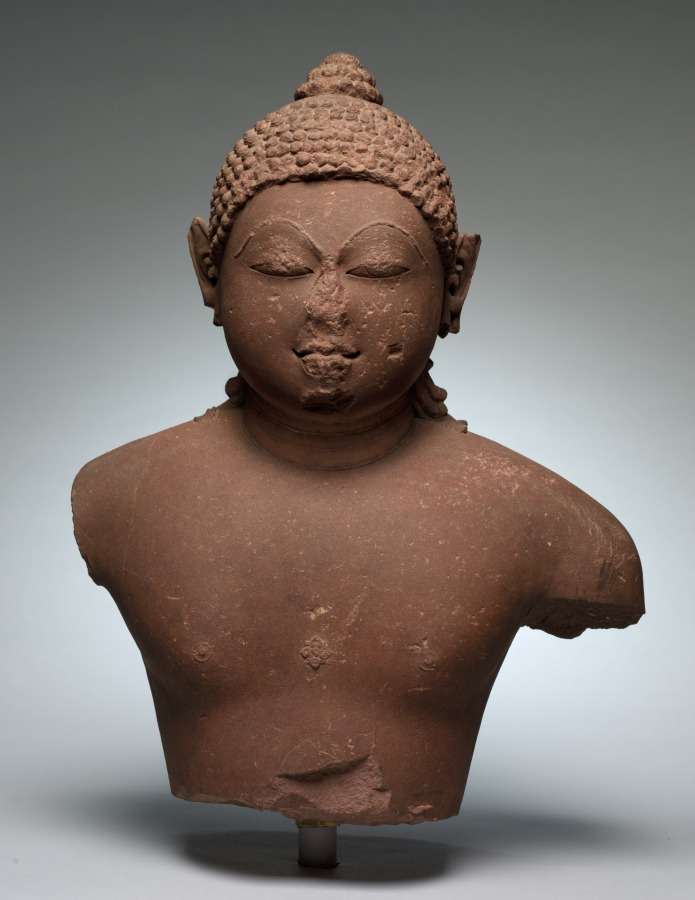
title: Rishabha, the First Jina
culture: Central India, Chandela Dynasty, 9th - 10th Century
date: 800s–900s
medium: stone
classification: Sculpture